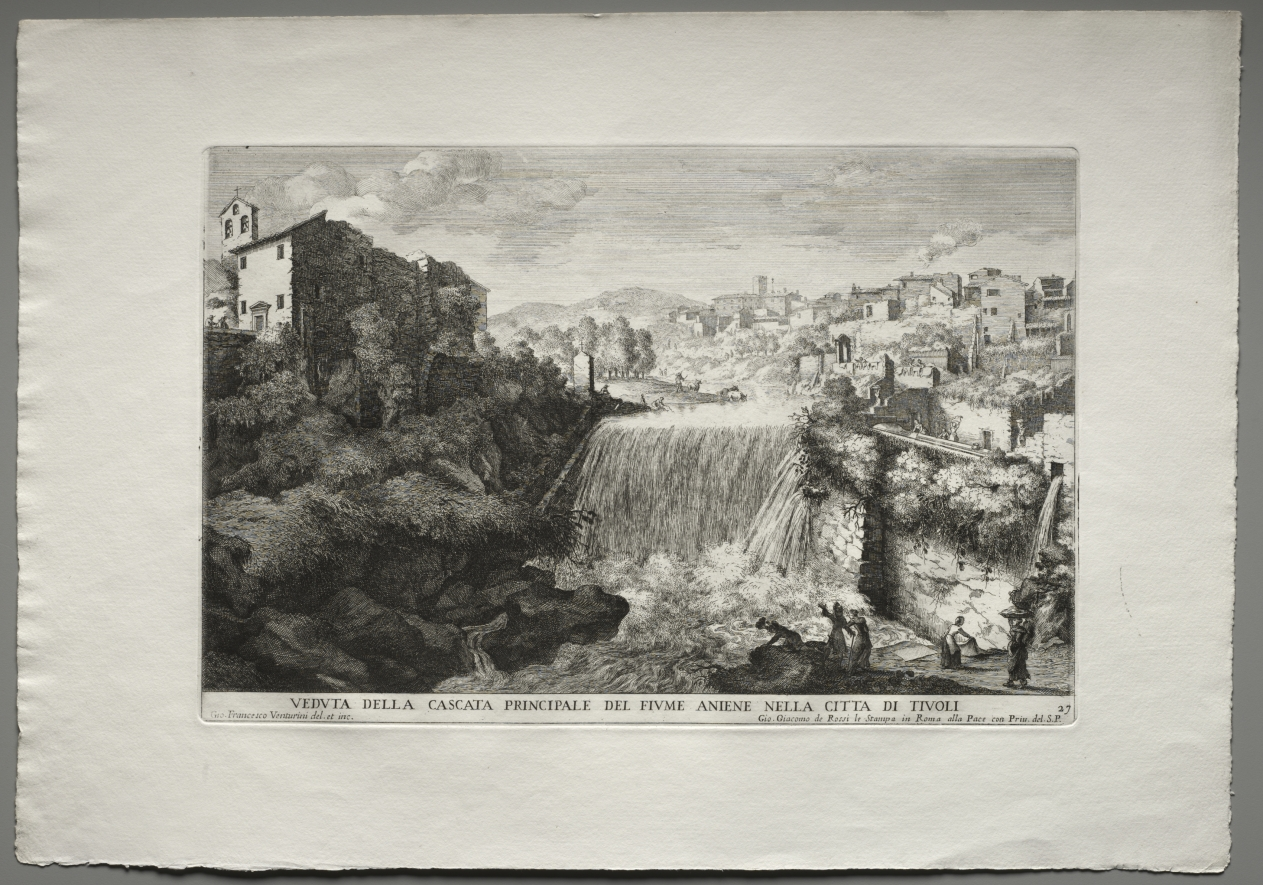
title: The Fountains of Rome (Le fontane di Roma), Book IV, plate 27: View of the Principal Cascade of the River Aniene in the City of Tivoli (Veduta della Cascata Principale del Fiume Aniene nelle citta di Tivoli)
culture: Italy, 17th century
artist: Giovanni Francesco Venturini (Italian, 1650–1710)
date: 1676–1700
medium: etching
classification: Print